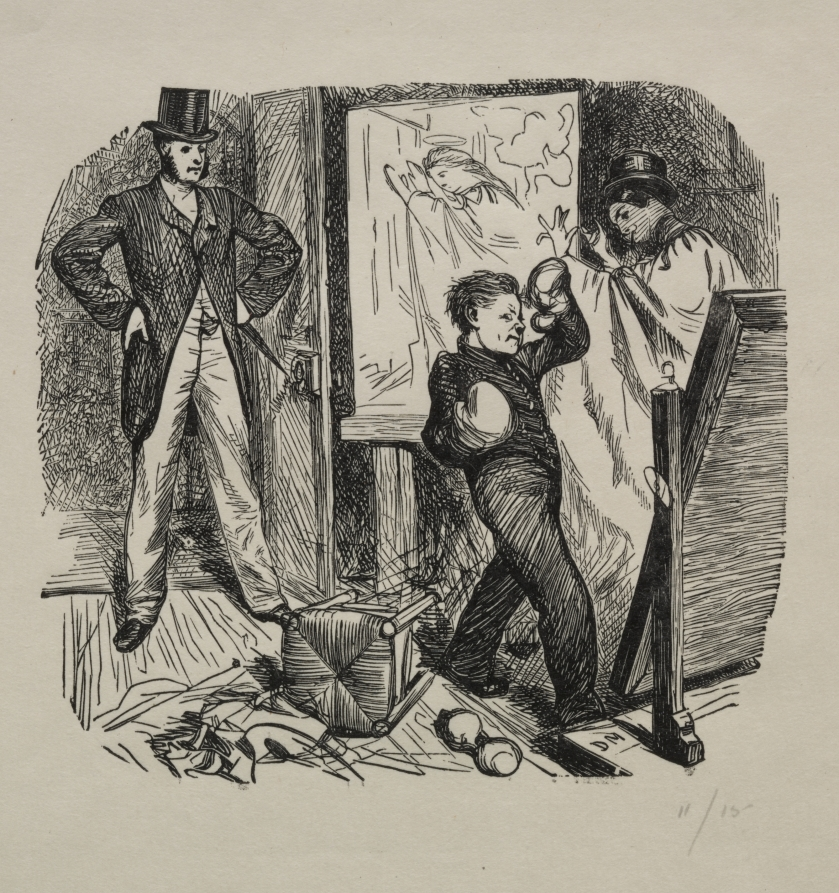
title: A Kettledrum in Mayfair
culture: England, 19th century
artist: George Louis Palmella Busson Du Maurier (British, 1834–1896)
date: 1862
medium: wood engraving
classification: Print